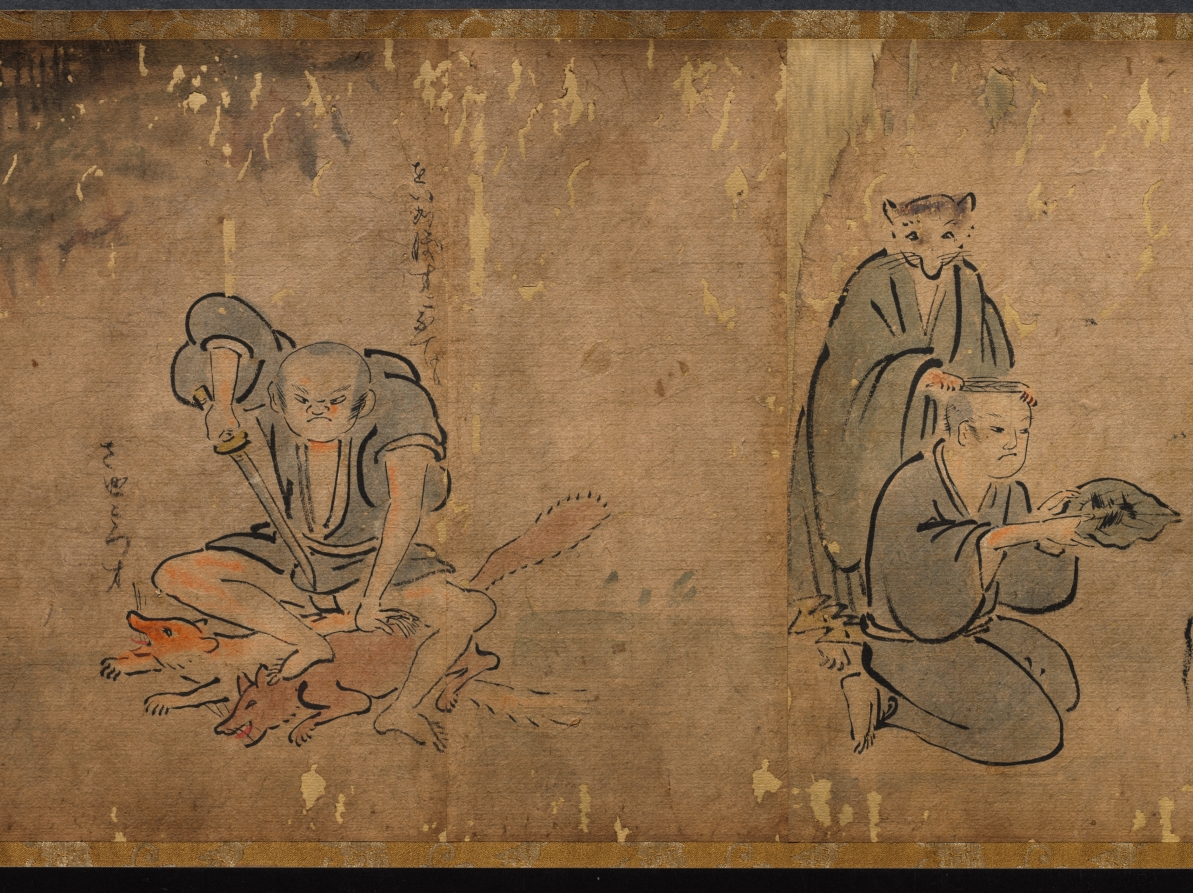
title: The Illustrated Tale of Oishi Hyōroku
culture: Japan, Edo period (1615–1868)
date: 1700s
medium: handscroll; ink and color on paper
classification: Painting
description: This incomplete handscroll illustrates part of the story of Oishi Hyoroku, a young man tasked with battling fox apparitions who were creating problems in his town. In other extant versions of the scroll, the story is set in the fall of 1624 in Kagoshima in southern Japan. Throughout the story, Hyoroku is tricked and terrified by the foxes that shift their shapes into a variety of monstrous phantoms. After repeated humiliations, he eventually captures two of the foxes. In this version, colloquial texts that function like text blurbs in comics appear throughout the scroll, but the main text is missing.